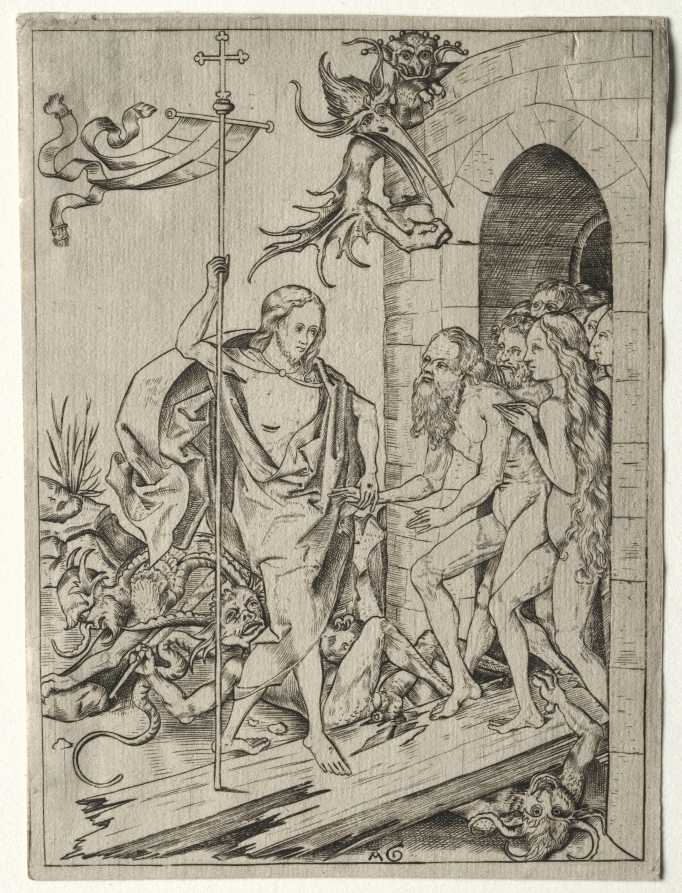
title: The Descent into Limbo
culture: Germany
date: 1400s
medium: engraving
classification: Print